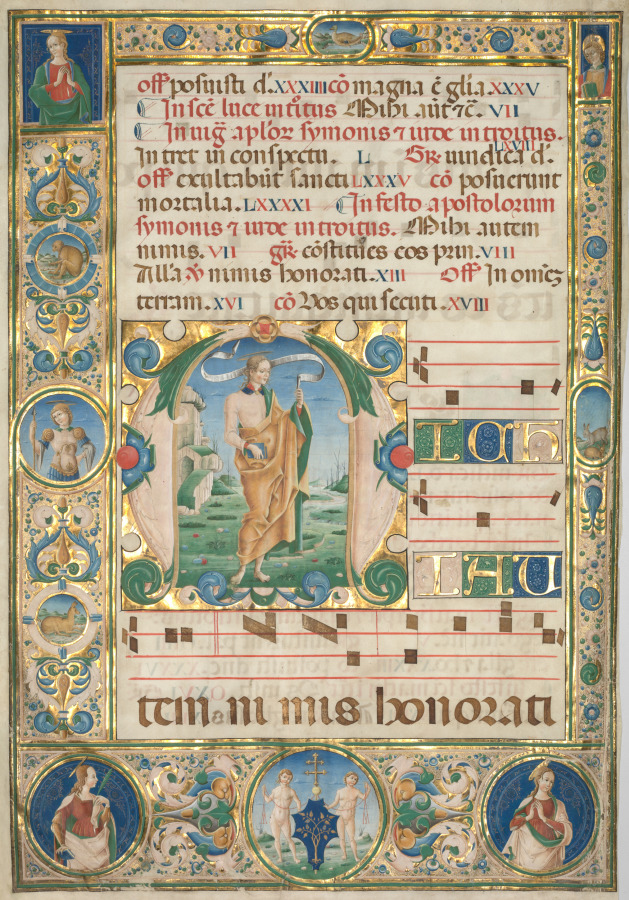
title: Leaf from a Gradual: Initial (M) with St. Andrew (recto)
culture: Italy, Ferrara, 15th century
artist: Jacopo Filippo d' Argenta (Italian, 1501)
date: c. 1480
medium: ink, tempera, and gold on parchment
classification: Manuscript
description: This leaf was excised from a volume of a large set of choral books known to have been commissioned by Bartolomeo delle Rovere for Ferrara Cathedral. Delle Rovere, nephew of Pope Sixtus IV, was the Bishop of Ferrara from 1474 to 1494 and his arms appear in the rondel at the bottom of the page-a shield bearing an oak tree (rovere in Italian) surmounted by a patriarchal cross, the symbol of his rank and authority. Payment records indicate that Argenta worked on the choir books for Ferrara Cathedral from 1478 to 1486. The initial M introduces the chant for the Introit (introduction) to the mass for the Feast of Saint Andrew, celebrated on November 30. This date also marks the beginning of the Advent season (leading to Christmas) in the liturgical calendar.